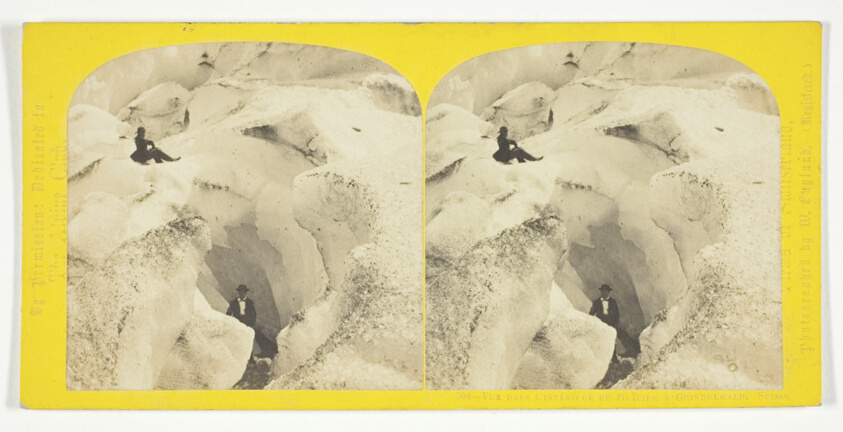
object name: Photograph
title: View from the Interior of the Glacier at Grindelwald, Suisse, No. 304 from the series "Views of Switzerland"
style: 19th century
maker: William England (English, 1816–1896)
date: 1850/96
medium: Albumen print, stereo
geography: England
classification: stereograph (albumen); albumen silver print; photographic process; photography; photograph